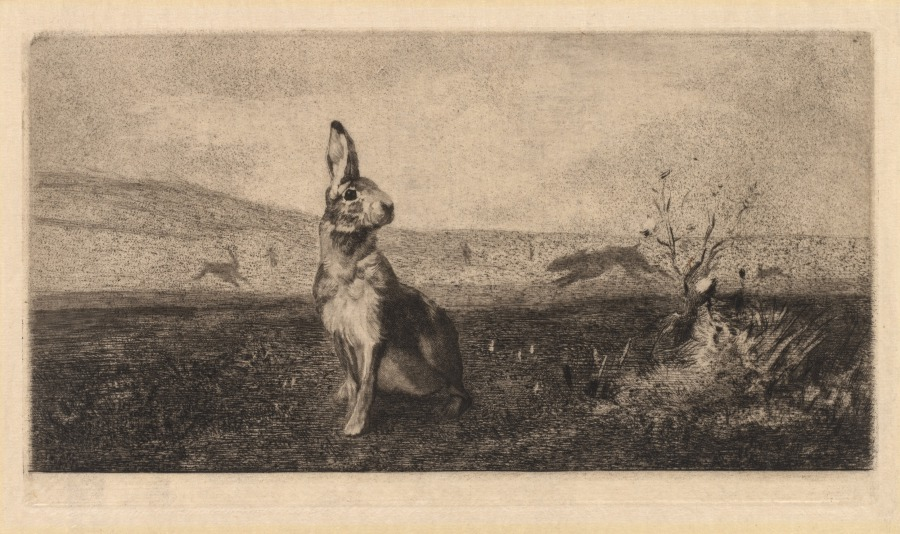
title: The Hare (Le Lièvre)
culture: France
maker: after Albert de Balleroy (French, 1828–1873)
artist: Félix Bracquemond (French, 1833–1914)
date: 1865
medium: soft-ground etching and drypoint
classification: Print